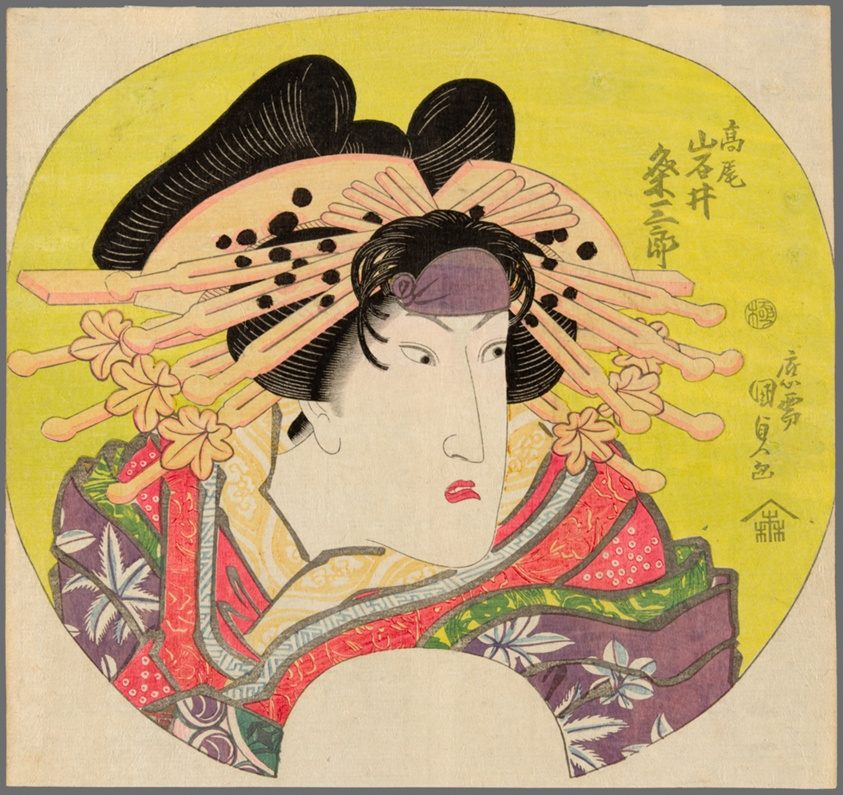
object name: Print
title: Iwai Kumesaburo II as the Courtesan Takao in Banzei Okuni Kabuki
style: Japanese (culture or style)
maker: Utagawa Kunisada I; Japanese, 1786-1865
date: c. 1827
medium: Color woodblock print; uchiwa-e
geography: Japan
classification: woodblock print; print